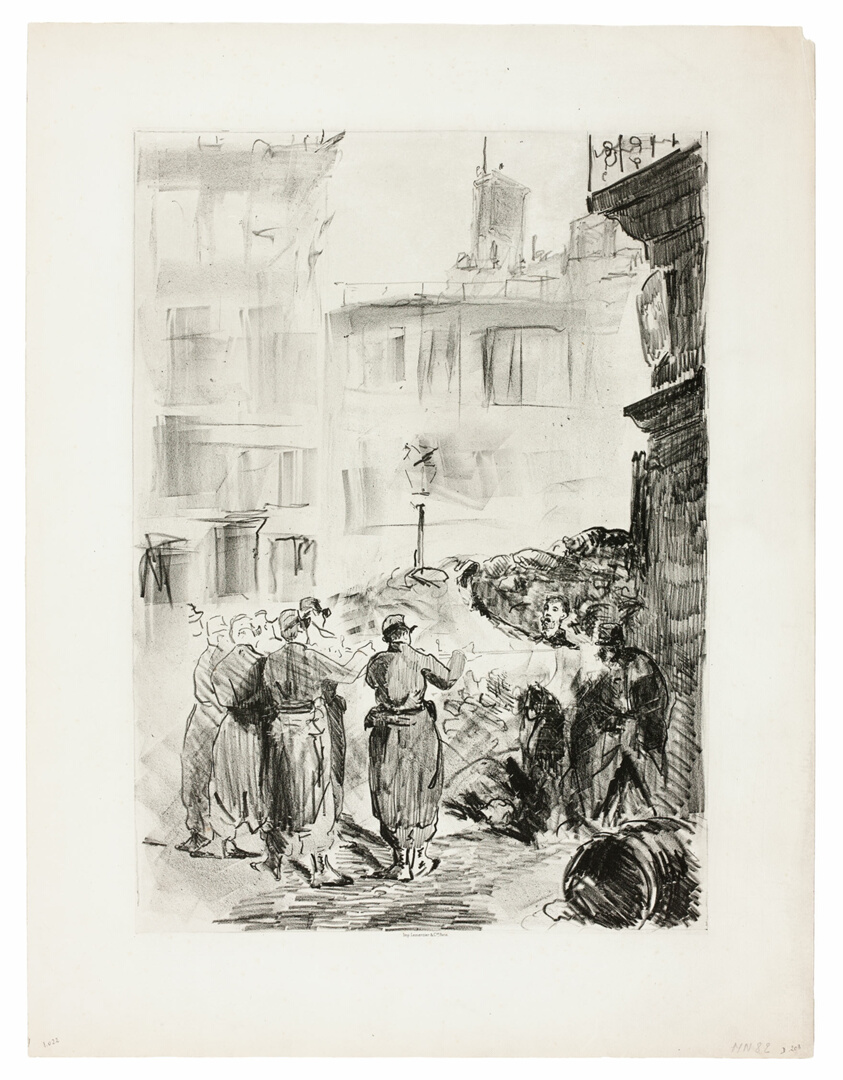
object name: Print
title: The Barricade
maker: Édouard Manet (French, 1832-1883); printed by Lemercier et Compagnie (French, 19th century)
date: 1871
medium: Lithograph in black, with scraping, on ivory chine laid down on ivory wove paper (chine collé)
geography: France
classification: lithograph; print; prints and drawing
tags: war